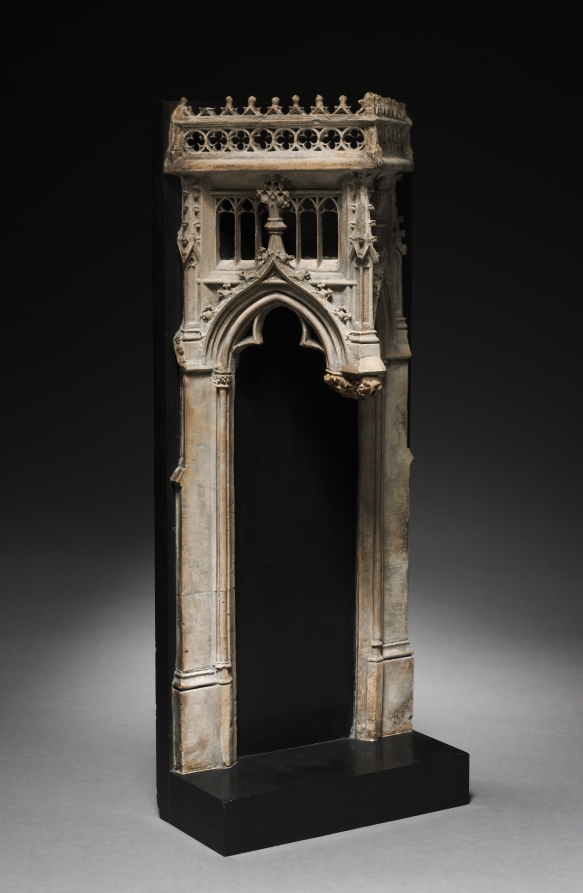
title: Architectural Canopy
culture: France, Burgundy, 15th century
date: c. 1450–1475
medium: limestone from Tonnerre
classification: Sculpture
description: Part of a pair of canopies, both must have originally belonged to an architectural ensemble like a tomb or a choir screen set within a church. Strikingly carved as architecture in miniature, they contain all of the elements of Flamboyant Gothic architecture of the late 15th century, so named after its flame-like stone tracery with wavy ornaments. This style of architecture is characterized by its intricacy of detailing and virtuosity of workmanship. Small sculptures may have originally occupied the space beneath the canopies.